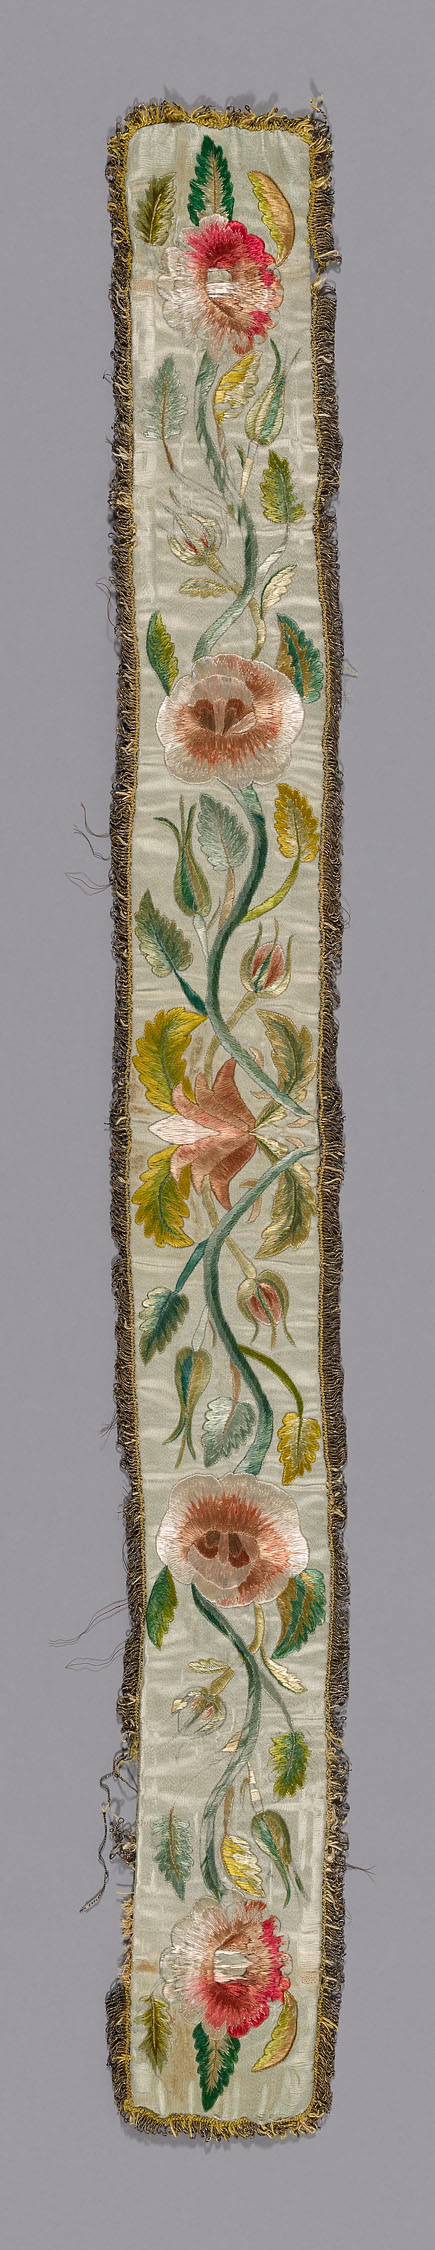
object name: Textile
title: Border Fragment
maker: France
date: 1775/1825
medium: Silk, satin weave; embroidered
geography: France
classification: textile; needlework (visual works)